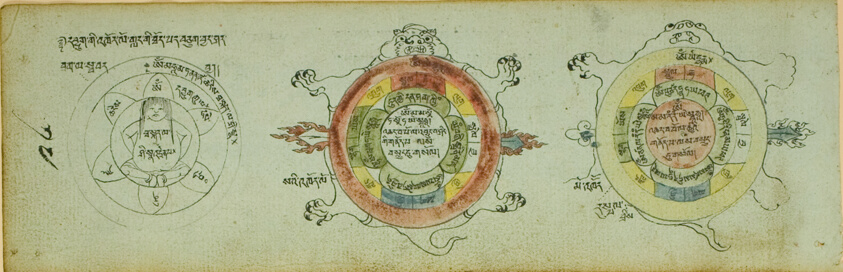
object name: Painting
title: Page from a Manuscript with Diagrams Protecting against Children's Illnesses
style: Himalayan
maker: Tibet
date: 19th century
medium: Ink and watercolor on paper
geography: Tibet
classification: pen and ink drawings; manuscript; asian art; painting